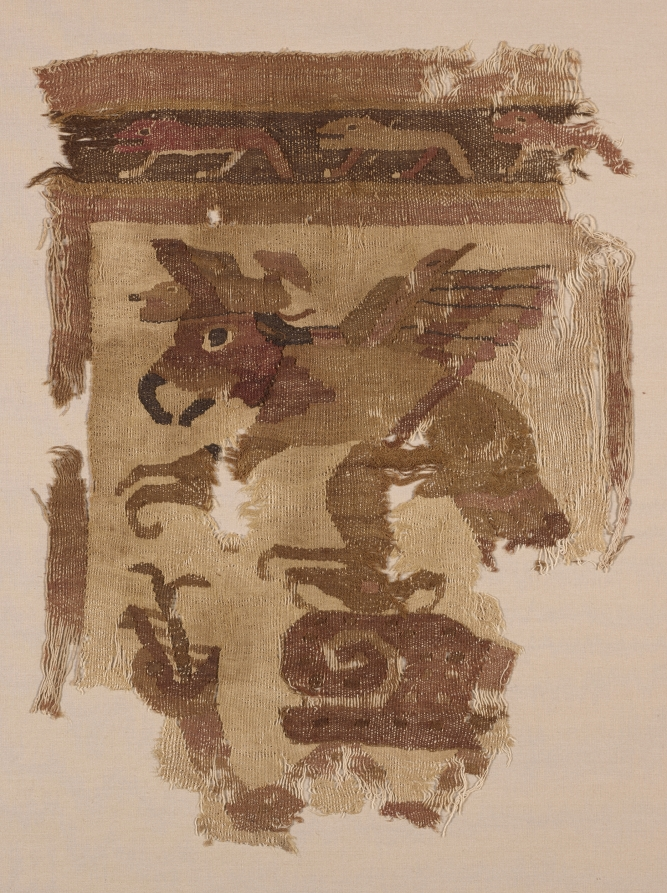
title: Textile Fragment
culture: Peru, Moche, north coast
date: c. 50–650 CE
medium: cotton and camelid fiber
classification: Textile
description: This fragment, one of several in the collection, is a rare survivor of catastrophic rains that destroyed much of the Moche textile legacy and may have helped to bring about the decline of Moche culture. It depicts a serpent and a snail beneath a hovering raptorial bird—perhaps a snail kite, a type of hawk named after its favored food. The size of the motifs implies that the original textile was large; a mantle (a shawl-like garment) or a hanging are among the possibilities.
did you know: This fragment is a rare survivor of floods that destroyed much of the Moche textile record.